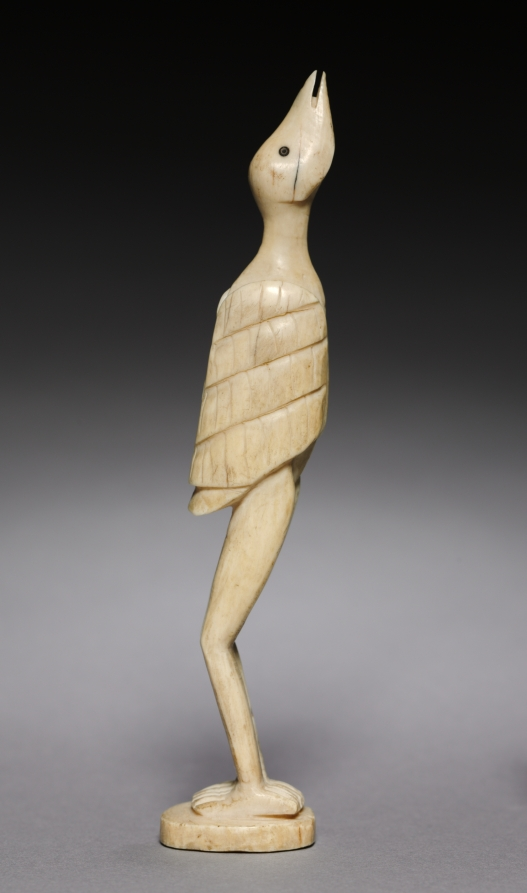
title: Bird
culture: Africa, Central Africa, Democratic Republic of Congo, unknown maker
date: 1900s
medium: Elephant ivory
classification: Sculpture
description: This long-legged bird of an unidentified species was most likely carved as a souvenir.